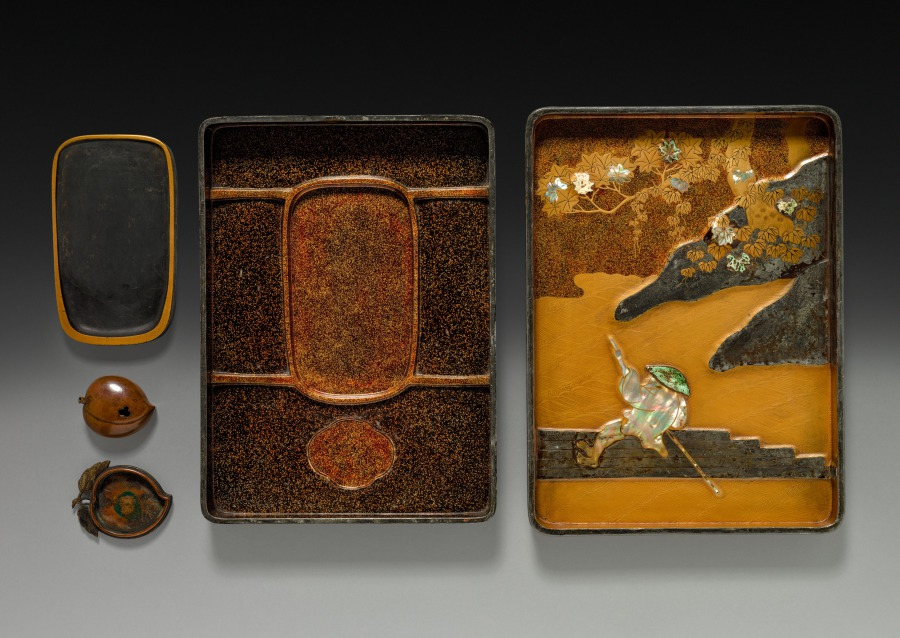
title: Inkstone Case and Lid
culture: Japan, Edo period (1615–1868)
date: 1800s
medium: lacquer on wood inlaid with mother-of-pearl, applied carved metal, and glazed ceramic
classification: Lacquer